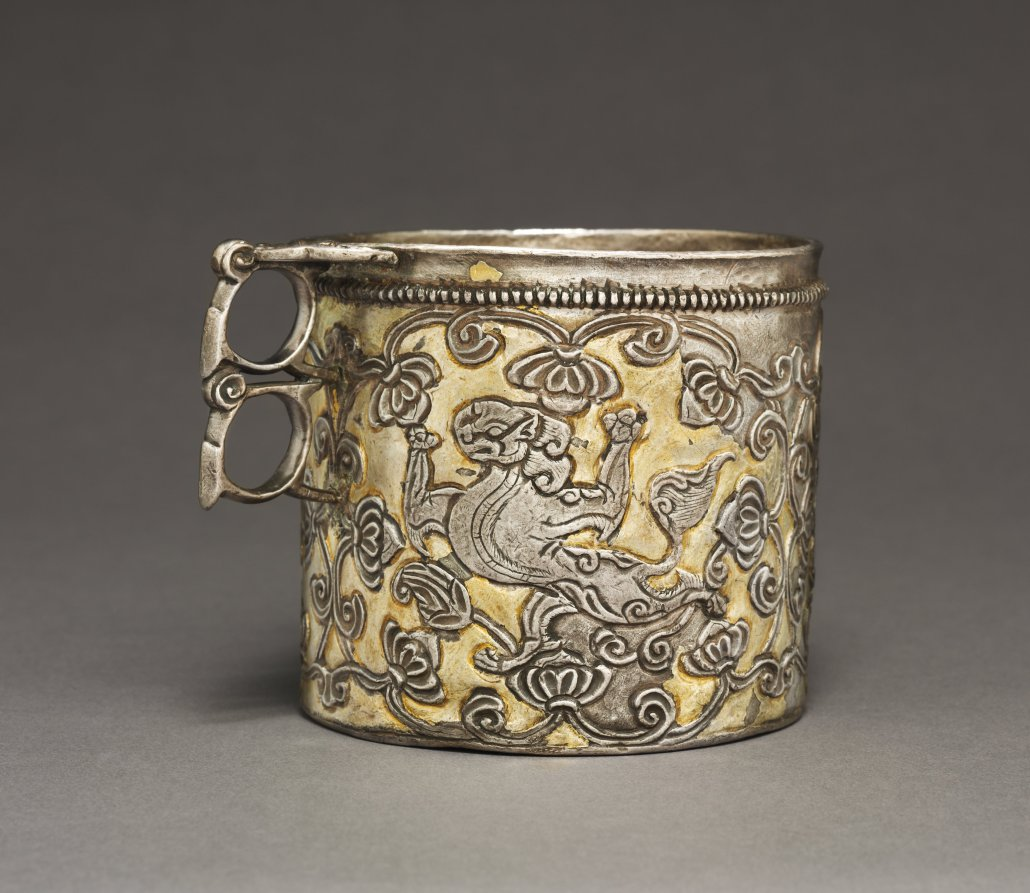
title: Beaker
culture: Central Asia (Sogdiana) or Tibet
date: c. late 600s–early 700s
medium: silver with gilding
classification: Silver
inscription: Inscribed on bottom of the cup: "Phan shing gong skyes gui sug byad (or byang)"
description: The circular shapes of the cup’s handle feature a flat edge on which the user rested their thumb for better grip, a design characteristic of silver objects made during the 700s by Sogdian artists, who traveled from Central Asia along international trade routes. An ownership inscription in Tibetan script on the underside of the cup identifies the vessel as a personal possession. The circles and lines carved below this inscription are likely measurements recording the weight of the silver used for the cup.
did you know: This cup depicts two lions and a lionlike animal with horns!